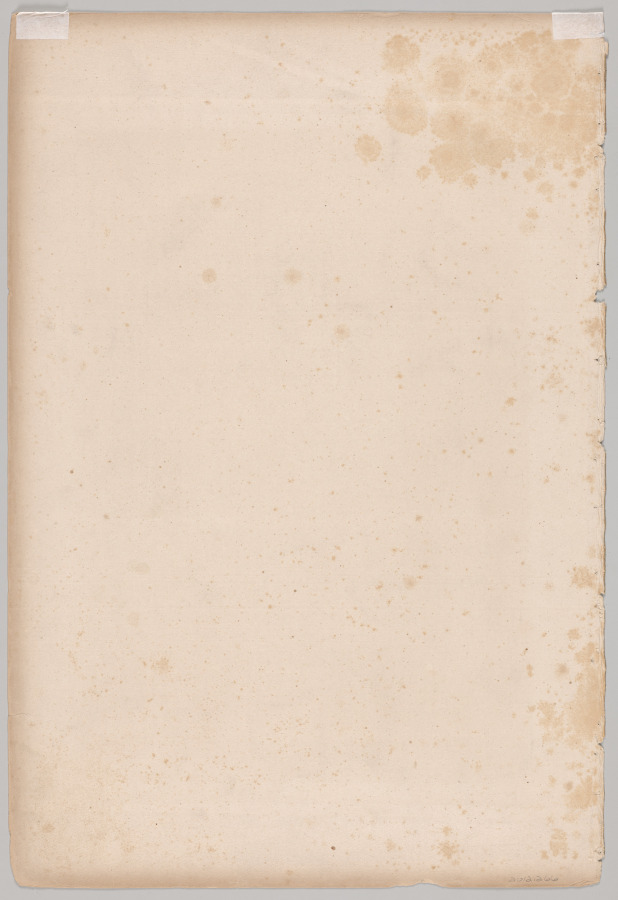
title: Picturesque Sketches in Spain: The Mosque, Cordova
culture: England, 19th century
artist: Thomas Shotter Boys (British, 1803–1874)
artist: after David Roberts (Scottish, 1796–1864)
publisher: Hodgson & Graves, 6, Pall Mall, London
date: 1837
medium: lithograph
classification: Print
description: This print shows the Mosque of Cordoba, in Andalusia, southern Spain, being used as a Catholic cathedral. The site was a mosque from 785 through 1236, when it was converted into a cathedral under the Christian kingdom of Castile. Today the building includes both Islamic and Christian architectural elements. The scalloped archway recalls the period in which the Moors, a Muslim cultural group, ruled parts of Spain and Portugal. An altar with a crucifix is visible, and the Christogram IHS (an abbreviation of the first three letters of Jesus’s name in Greek) can be seen on one priest’s shoulder.